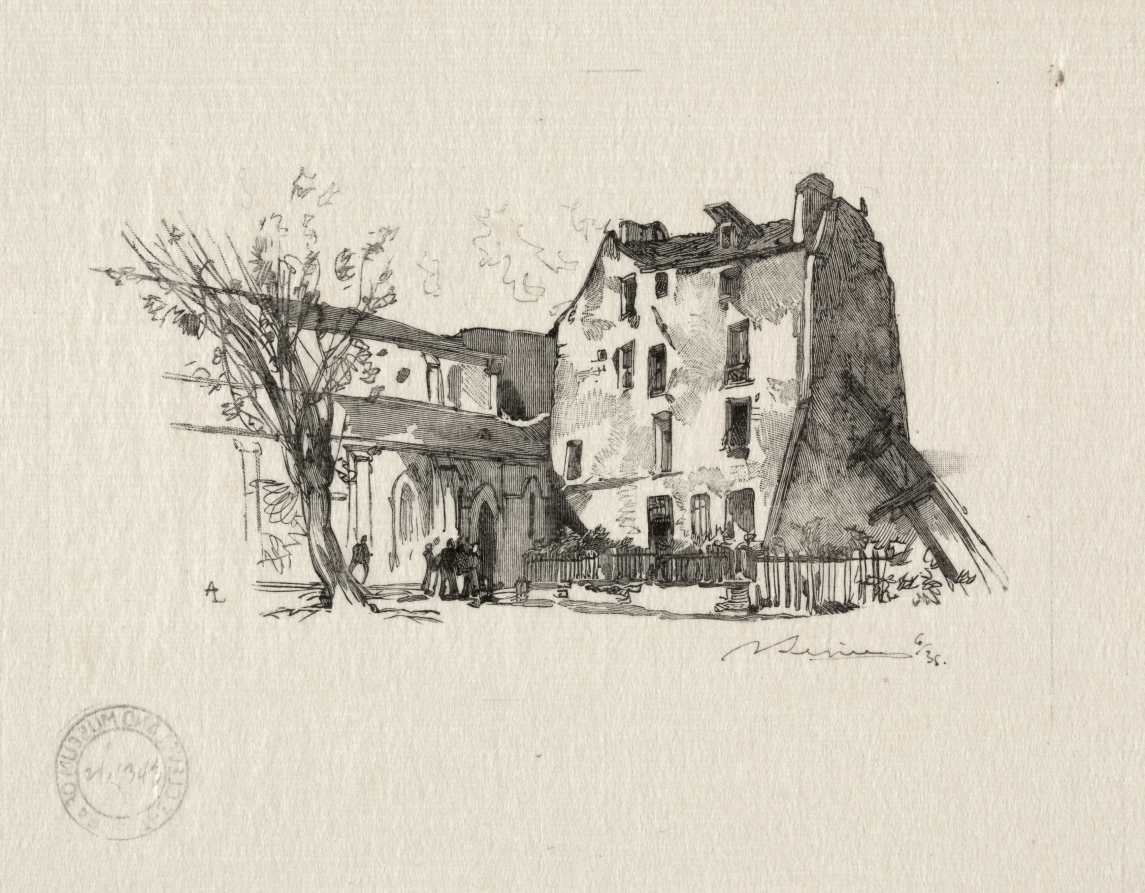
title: St. Julien le Pauvre: Le Presbytère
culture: France, 19th-20th century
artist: Auguste Louis Lepère (French, 1849–1918)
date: c. 1870–1918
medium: wood engraving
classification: Print